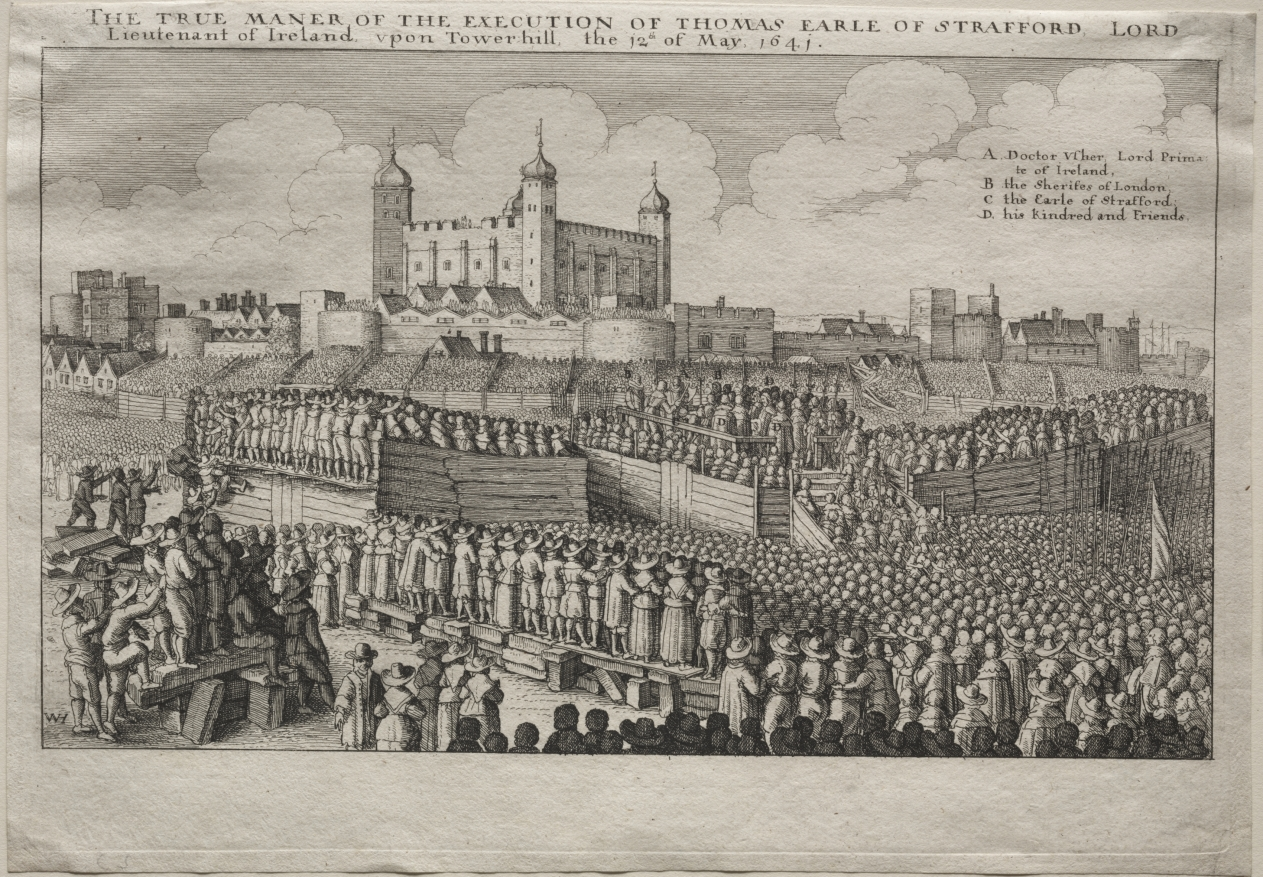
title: Execution of the Earl of Strafford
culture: Bohemia, 17th century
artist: Wenceslaus Hollar (Bohemian, 1607–1677)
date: 1641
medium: etching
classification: Print